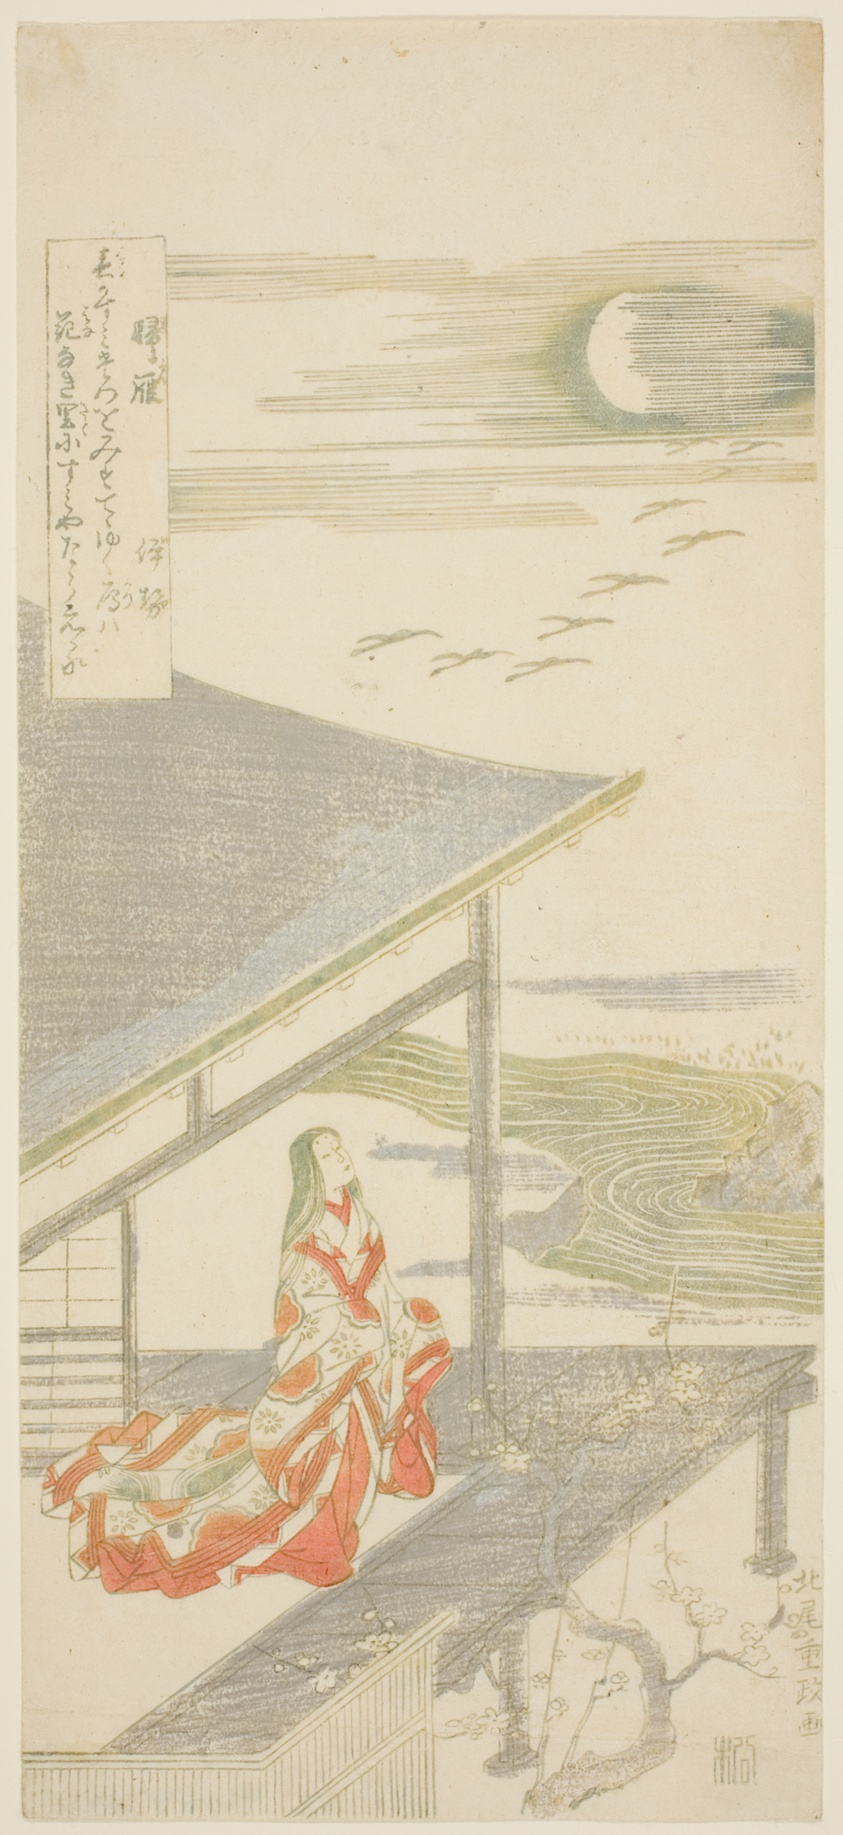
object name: Print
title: The Poet Ise Looking Up at a Flock of Returning Geese, from an untitled series of eight views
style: Japanese (culture or style)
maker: Kitao Shigemasa (Japanese, 1739-1820)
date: early 1760s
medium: Color woodblock print; hosoban, mizu-e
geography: Japan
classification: woodblock print; print; asian art